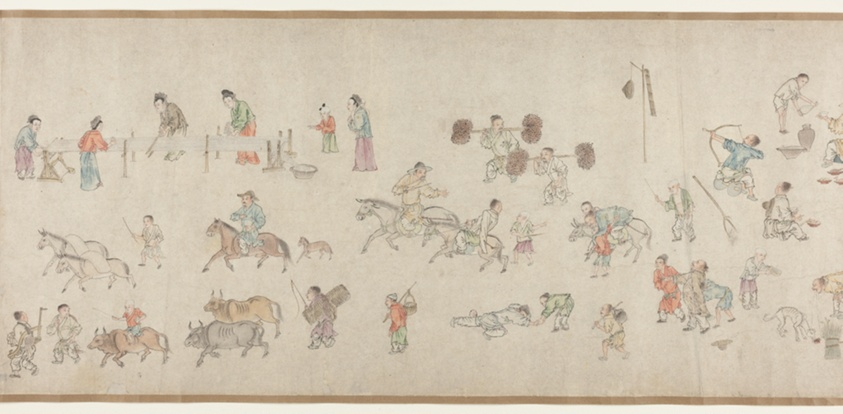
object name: Painting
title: Street Scenes in Times of Peace 太平風會圖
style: Chinese (culture or style)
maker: Zhu Yu (Zhu Junbi) 朱玉（朱君璧）; Chinese, 1293-1365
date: Yuan dynasty (1279–1368), 14th century 元朝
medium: Handscroll; ink and colors on paper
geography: China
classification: handscroll; painting; asian art